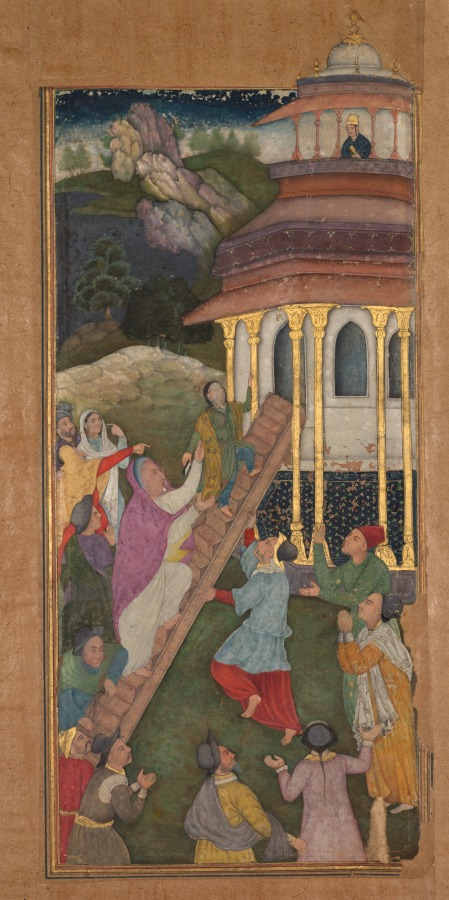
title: Mary ascends the stairs to the temple, from a Mirror of Holiness (Mir’at al-quds) of Father Jerome Xavier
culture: Mughal India, Allahabad, made for Prince Salim (1569–1627)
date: 1602–4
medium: Gum tempera, ink, color, and gold on paper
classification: Manuscript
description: Three-year-old Mary bounds up the stairs of the temple, eager to begin her education. Onlookers gesture in surprise. In the background the rocks have been cleverly shaded to look like faces—a Persian technique of visual double-entendre that the Mughals admired and adopted. This work is the second of the 27 surviving paintings made for this manuscript. The first, a scene of Mary’s birth, is in a private collection in Europe. Mary’s face had been painted with a fragile white paint, which has fallen off. Now only the underdrawing remains visible.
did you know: Mary’s instructor awaits her, book in hand, at the top of a temple of learning.